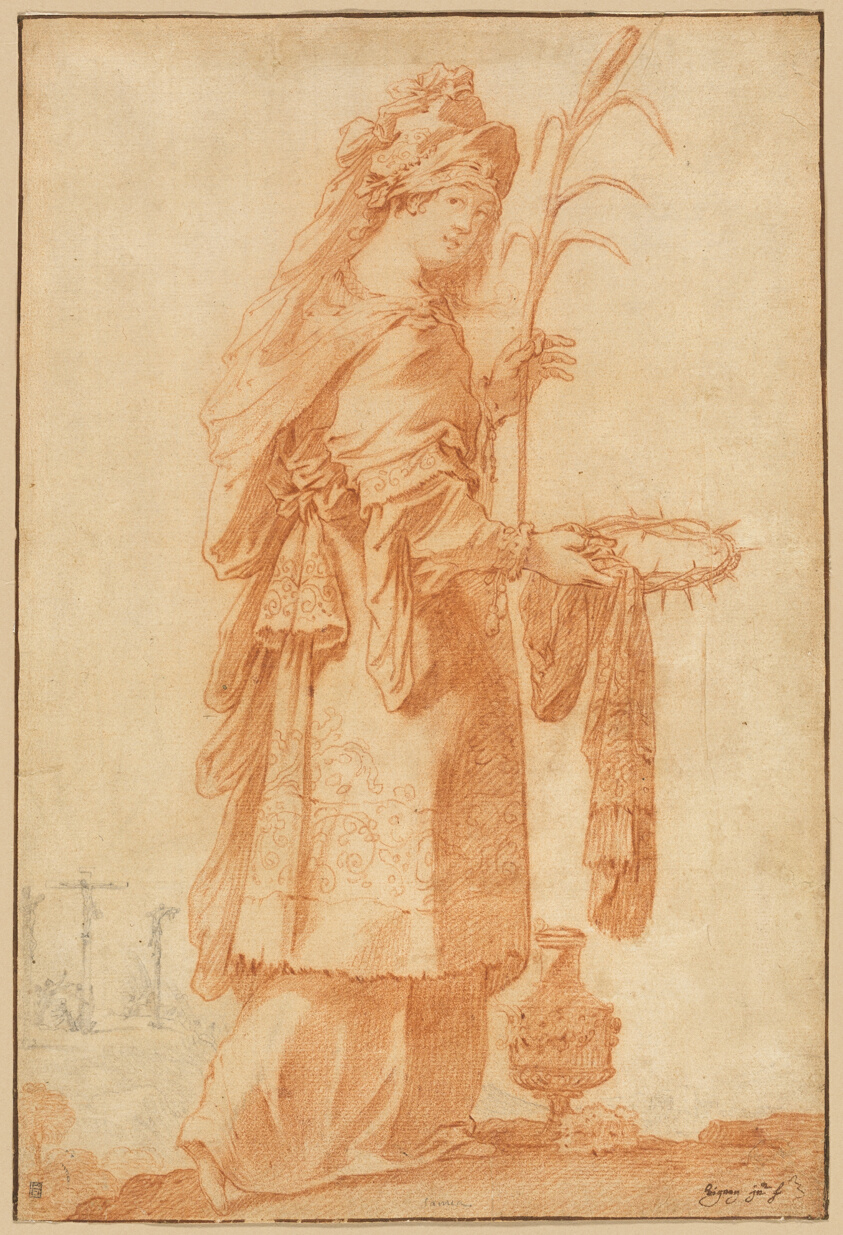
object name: Drawing and Watercolor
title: Samian Sibyl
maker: Claude Vignon (French, 1593-1670)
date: c. 1630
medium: Red chalk with graphite on cream laid paper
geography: France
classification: drawings (visual works); prints and drawing